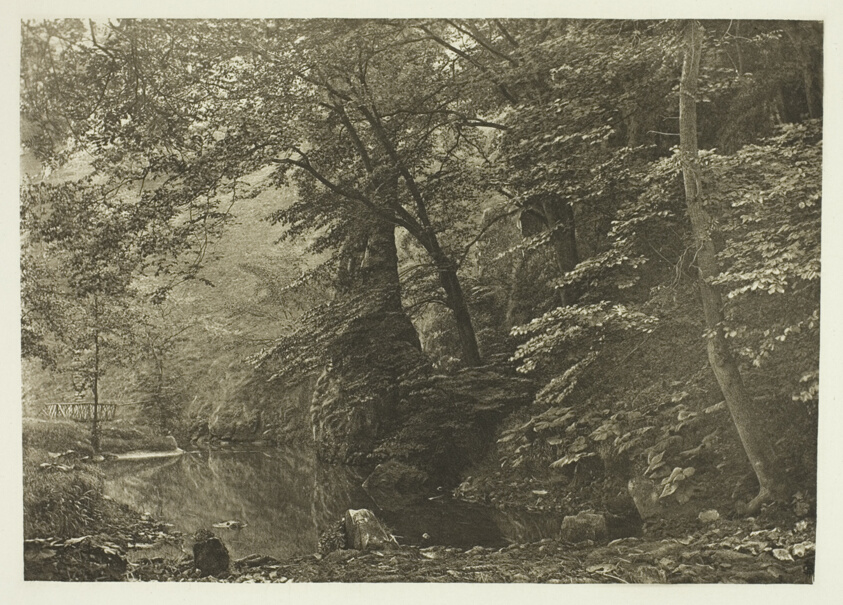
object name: Photograph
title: "Pike Pool" (from below)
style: 19th century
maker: Peter Henry Emerson (English, born Cuba, 1856–1936)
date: 1880s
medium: Photogravure, plate LI from the album "The Compleat Angler or the Contemplative Man's Recreation, Volume II" (1888)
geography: England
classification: photogravure; photomechanical process; photography; photograph